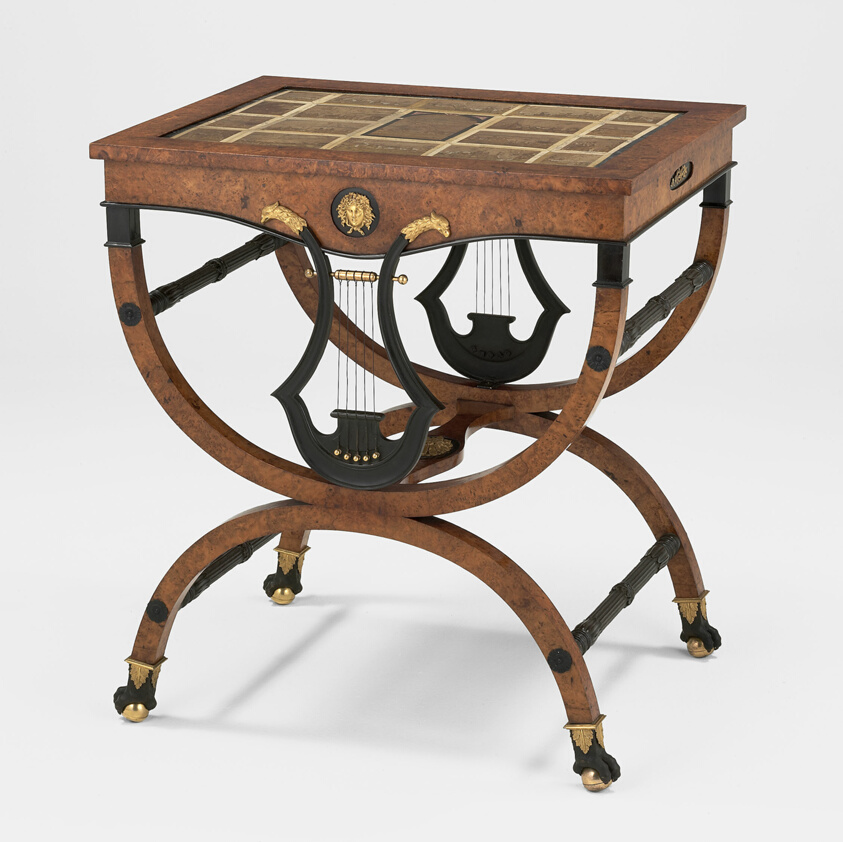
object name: Furniture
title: Table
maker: Germany, Berlin; After a design by Friedrich Gilly (German, born Prussia [present-day Poland], 1772–1800)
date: c. 1800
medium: Burl maple, fir or pine, gilt bronze, and marble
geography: Berlin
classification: table; european decorative arts; furniture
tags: furniture